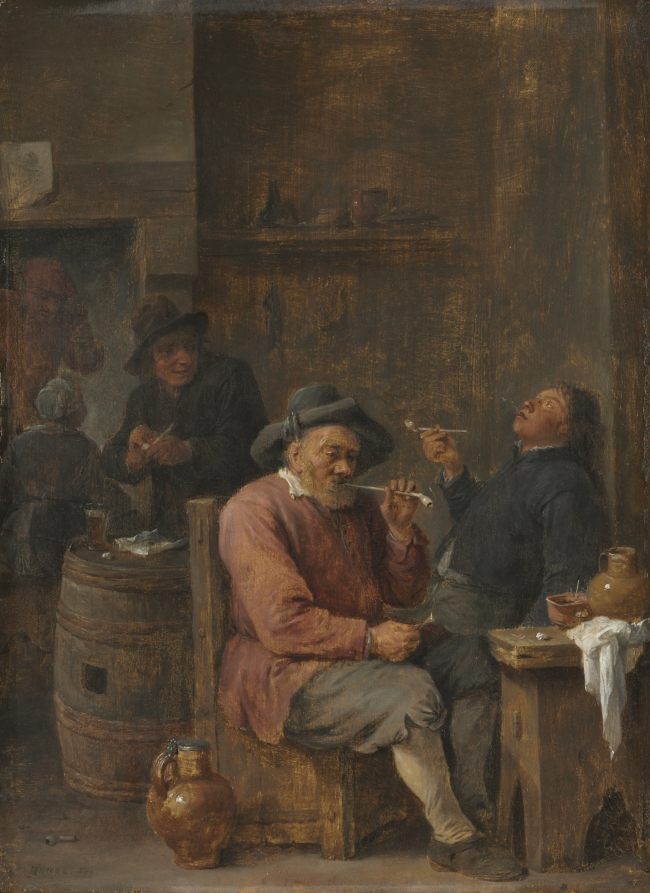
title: Peasants Smoking in an Inn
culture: Flanders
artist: David Teniers (Flemish, 1610–1690)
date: c. 1640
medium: oil on wood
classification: Painting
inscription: signed lower left: D. TENIERS. FEC.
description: David Teniers the Younger was a popular artist who specialized in small paintings of rustic Flemish life in the 1600s. In works such as Peasants Smoking in an Inn, an older man and a younger man in the foreground smoke tobacco. The younger man rests limply against the wall and his head lolls back, a gesture that symbolized that he had overindulged in smoke. Another standing man prepares his pipe and watches the younger man with amusement. Tobacco was a novelty in the 1600s, introduced from the Americas and East Indies with other new imports such as sugar cane and rice, and was believed to be a medicinal product. It was particularly recommended for people who lived in "waterish places" such as Antwerp, the capital of Flanders, where Teniers painted this scene. Although many medical practitioners believed tobacco to be a cure for numerous ailments, moral opponents to smoking criticized it as a danger to health and morals. The mixed reputation and widespread popularity of tobacco smoking thus made it a marketable and amusing subject for Flemish artists such as Teniers.